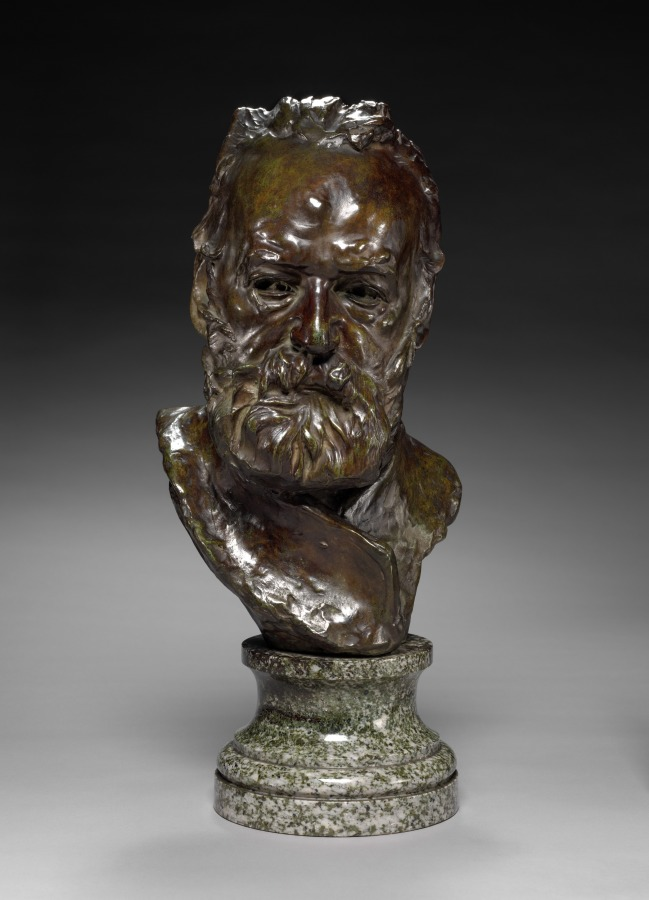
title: Bust of Victor Hugo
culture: France, 19th century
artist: Auguste Rodin (French, 1840–1917)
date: 1883 modeled; cast by 1917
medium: bronze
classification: Sculpture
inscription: inscribed on back: "A. Rodin" signed "Rodin" (back, lower left)